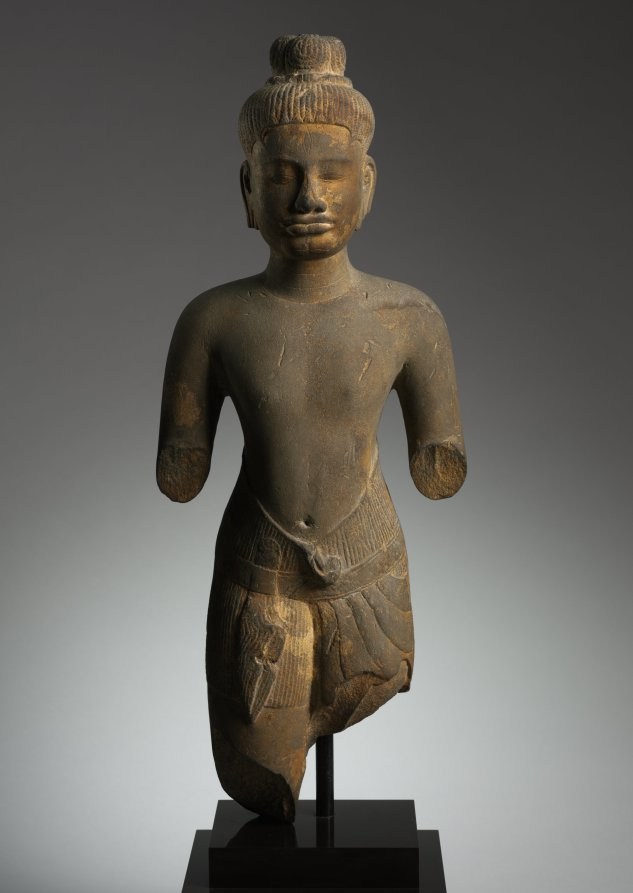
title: Shiva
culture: Cambodia, Angkor, Baphuon, early 12th century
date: early 1100s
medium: gray sandstone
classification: Sculpture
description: The parallel matted locks of hair and the incised third eye on the forehead identify this figure as the Hindu god Shiva. A close-cropped beard comes to a point at his chin. The slim elegant form and short lower garment fastened with a low-slung belt are features characteristic of this period.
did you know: Three beauty lines are lightly incised around the neck.